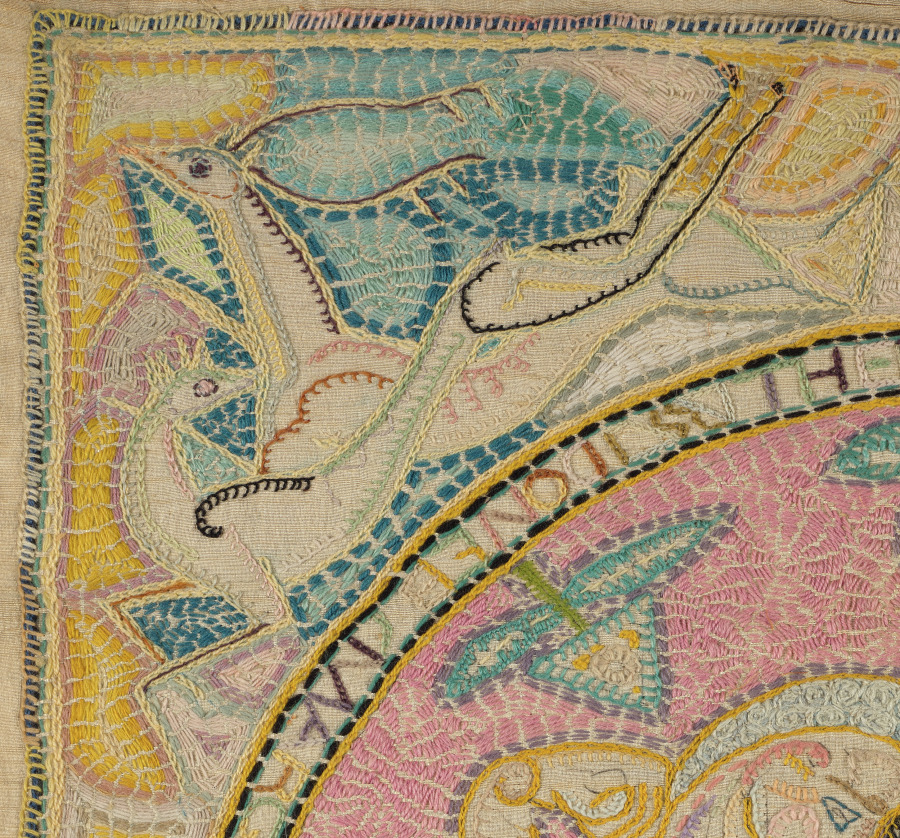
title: The Family (In Memory of a Summer in the White Mountains)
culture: America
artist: Marguerite Zorach (American, 1887–1968)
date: 1917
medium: plain weave silk; wool embroidery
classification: Embroidery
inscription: THE FAMILY / DONE BY MARGUERITE ZORACH IN THE YEAR NINETEEN HUNDRED AND SEVENTEEN IN MEMORY OF A SUMMER IN THE WHITE MOUNTAINS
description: Marguerite Zorach conceived her large, complex embroideries as major artistic statements at a time when the medium was routinely considered “craft,” as opposed to “fine art.” In doing so, she helped to erase such distinctions. One of her most acclaimed works, this example celebrates humanity in harmony with nature, presenting the artist, her husband (a Cleveland-raised sculptor named William Zorach), and their son amid an evergreen tree and four pairs of animals. Very time consuming to create, Zorach’s embroideries are rare.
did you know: In 1925, Zorach served as first president of the New York Society of Women Artists, an organization still in existence.